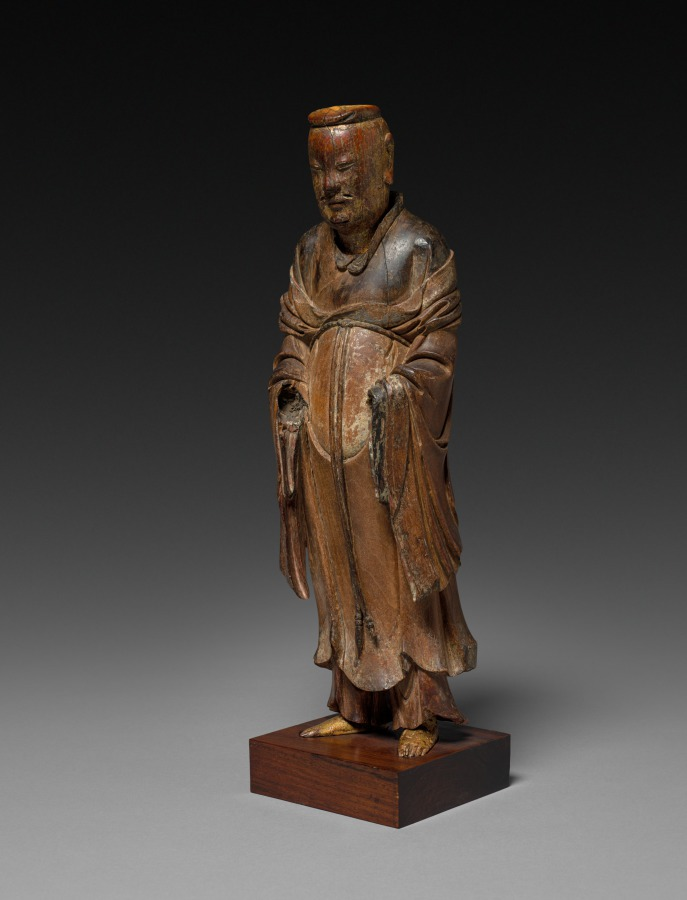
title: Daoist Figure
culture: China, Southern Song dynasty (1127-1279)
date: 1200s-1300s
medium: wood and ivory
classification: Sculpture